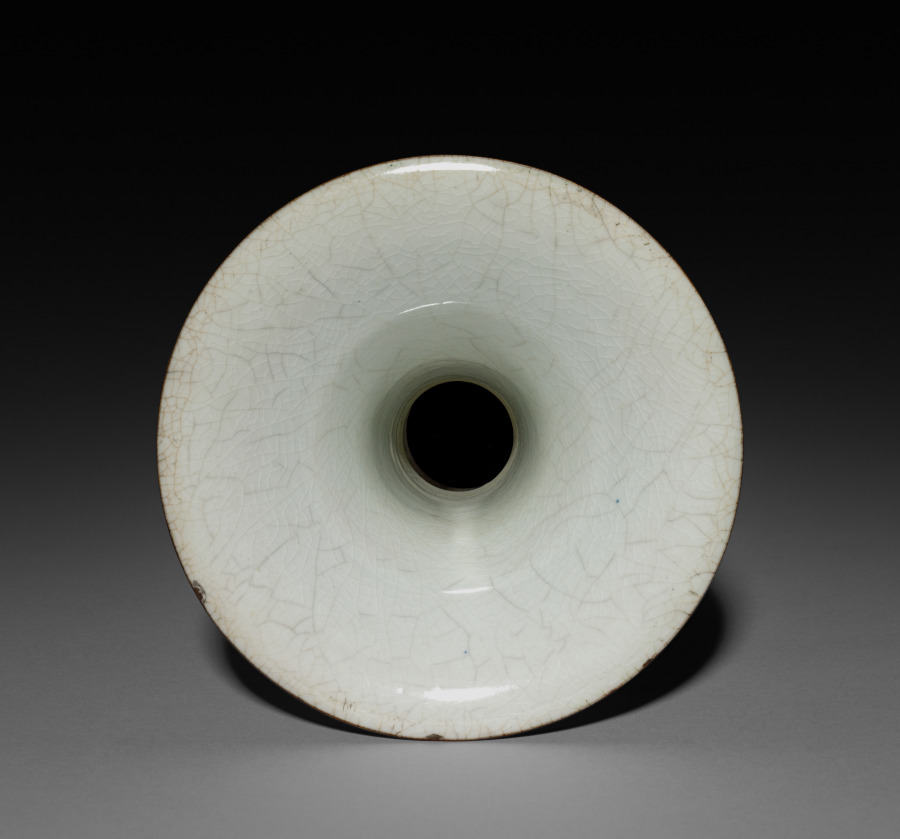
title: Beaker Vase in Form of Archaic Gu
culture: China, Jiangxi province, Jingdezhen kilns, Qing dynasty (1644-1911), Yongzheng reign (1723-35)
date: 1723–35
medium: porcelain with underglaze blue decoration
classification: Ceramic